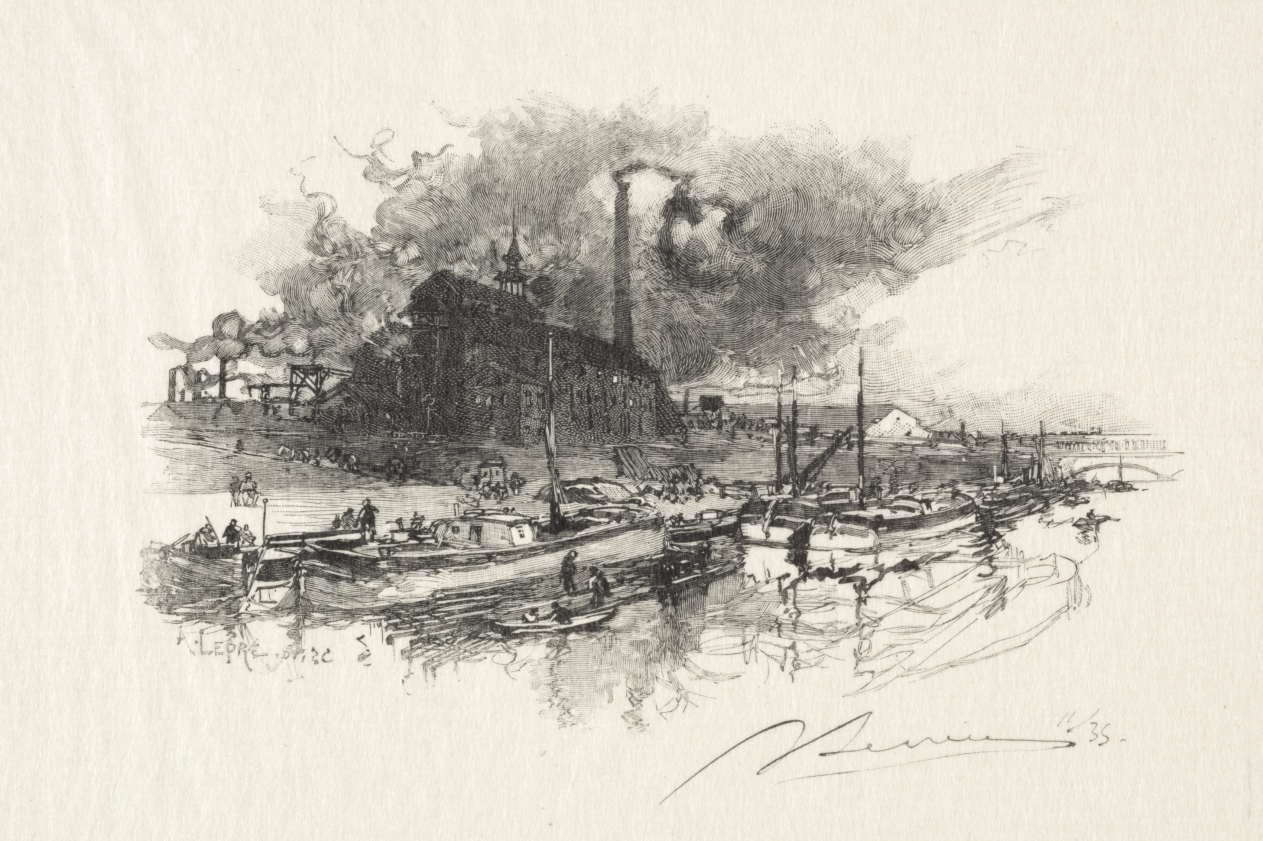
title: Javel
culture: France, 19th-20th century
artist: Auguste Louis Lepère (French, 1849–1918)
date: 1886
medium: wood engraving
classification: Print